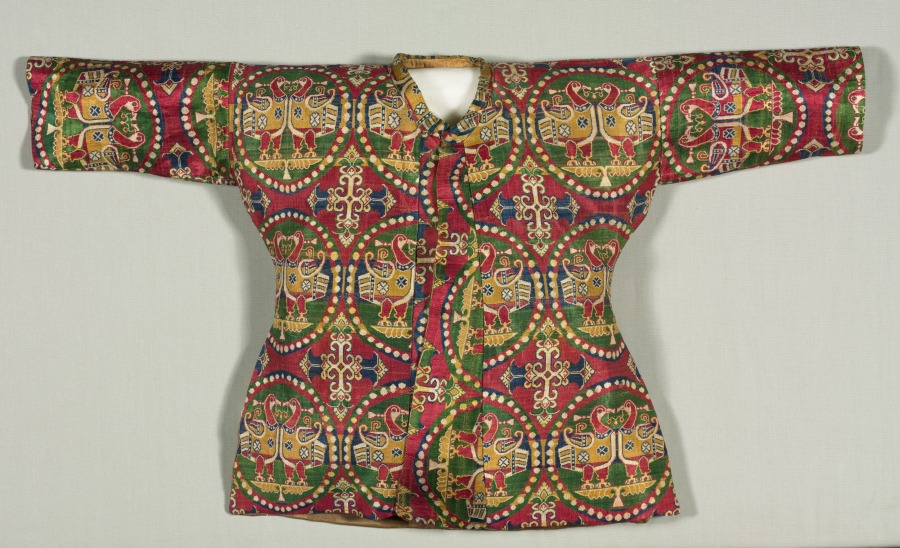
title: Child’s Coat with Ducks in Pearl Medallions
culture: Probably Sogdia (present-day Uzbekistan); China, Tang dynasty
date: 700s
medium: Silk: weft-faced compound twill weave (samite)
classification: Garment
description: The coat’s outer fabric is woven in five brilliant colors featuring paired ducks in pearl roundels, hallmarks of the precious and highly desired silks from Sogdia. The coat’s inner lining is a twill damask with a floral pattern made in China. The combination of Sogdian and Chinese silks in one garment with Tibetan ownership history is evidence of the vital exchange and cultural interaction among the peoples living along the trade routes of the Silk Road. This precious coat was presumably made for a Tibetan prince. Given the coat’s pristine condition, though, it is unclear whether the garment was ever worn, or was used as a diplomatic gift or perhaps as currency.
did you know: This coat is part of a set of garments that originally included an outer pair of pants and silk boots made from the same fabric.